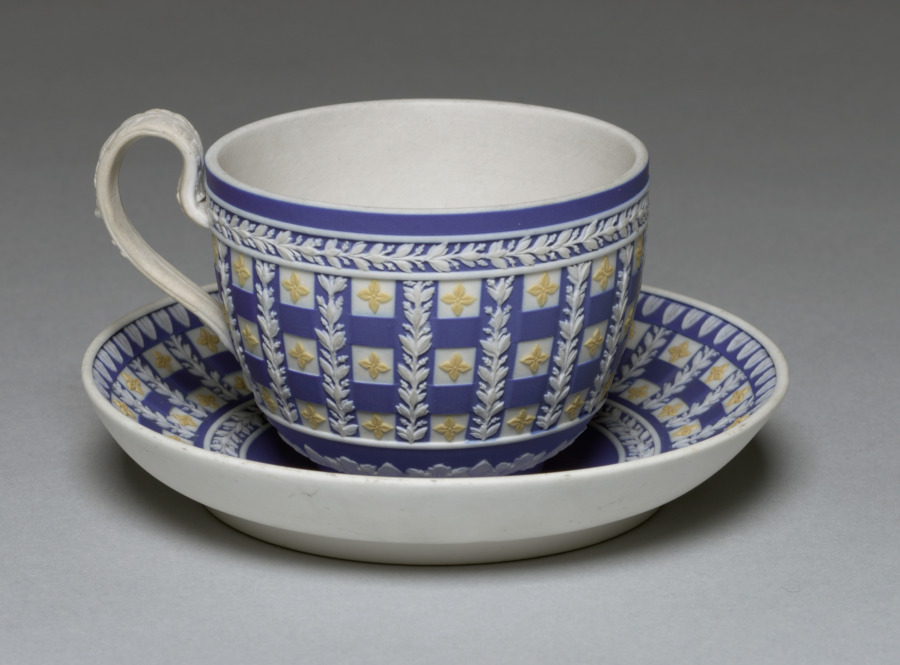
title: Cup and Saucer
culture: England, Staffordshire, 18th century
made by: Wedgwood Factory (British)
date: c. 1784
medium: jasper ware with relief decoration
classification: Ceramic